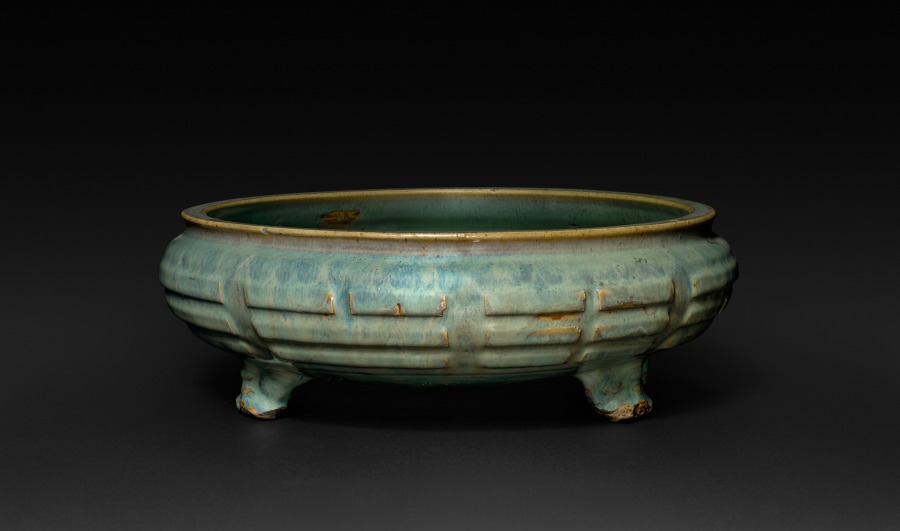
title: Tripod Bulb Dish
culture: China, Ming dynasty (1368–1644)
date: 1368–1644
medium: porcelain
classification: Ceramic